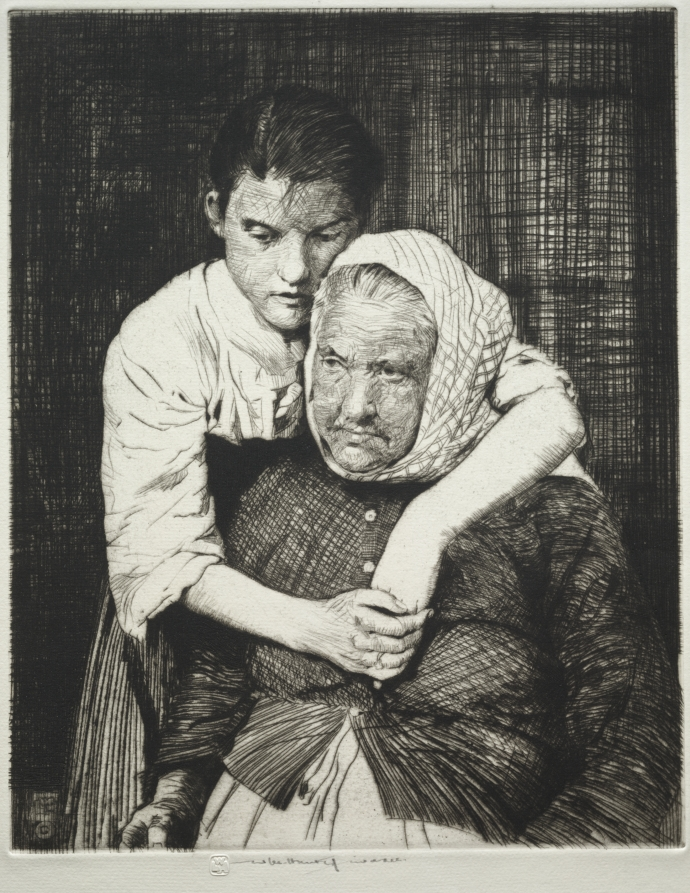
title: Etaples Fisher Folk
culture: England, 20th century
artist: William Lee Hankey (British, 1869–1952)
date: 1920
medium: etching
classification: Print